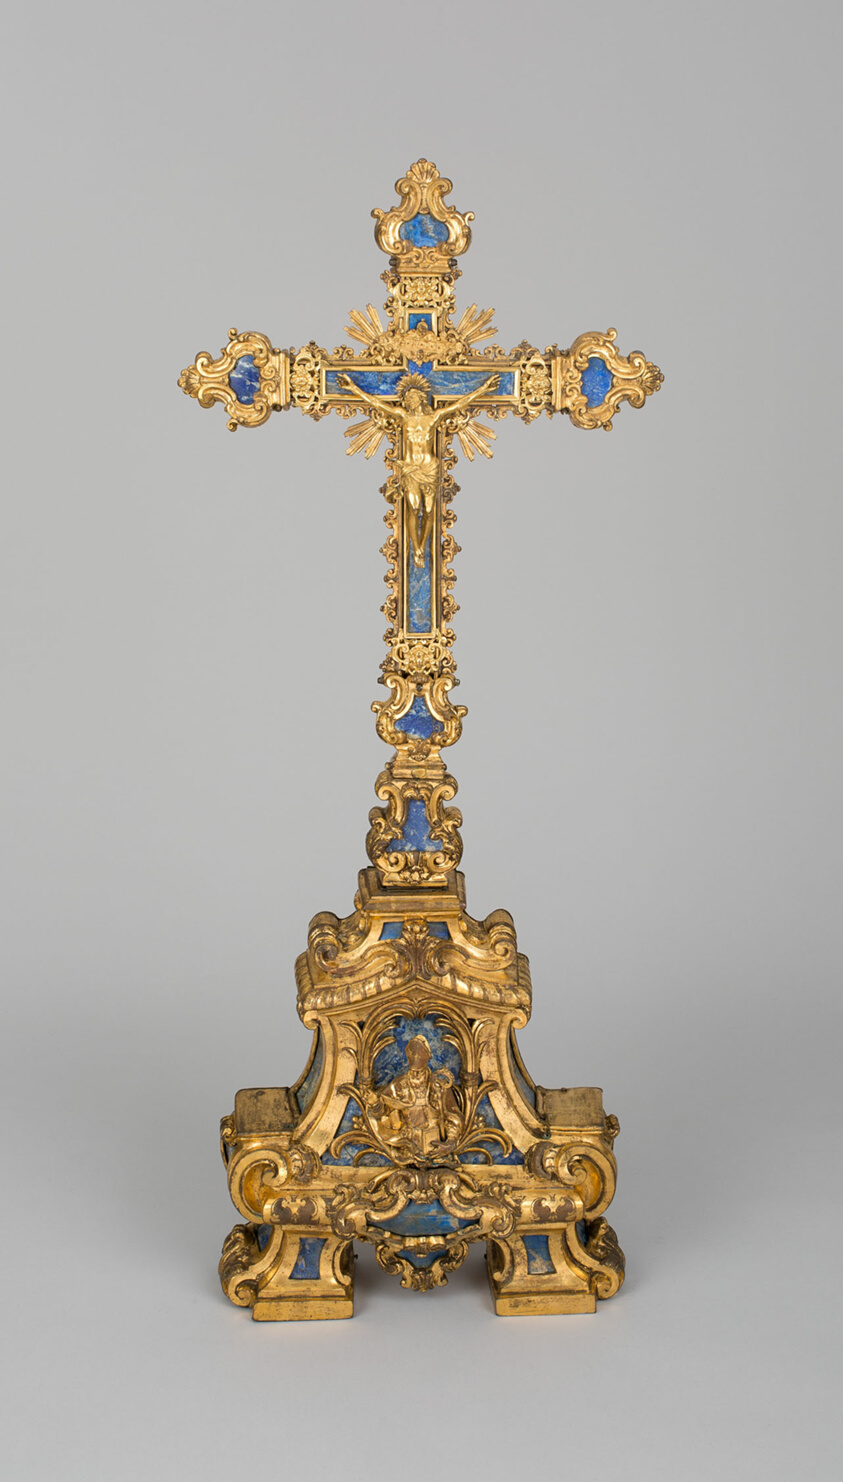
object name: Metalwork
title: Crucifix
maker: Naples, Italy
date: c. 1700/35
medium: Gilt bronze, lapis lazuli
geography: Naples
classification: bronze; metalwork; european decorative arts